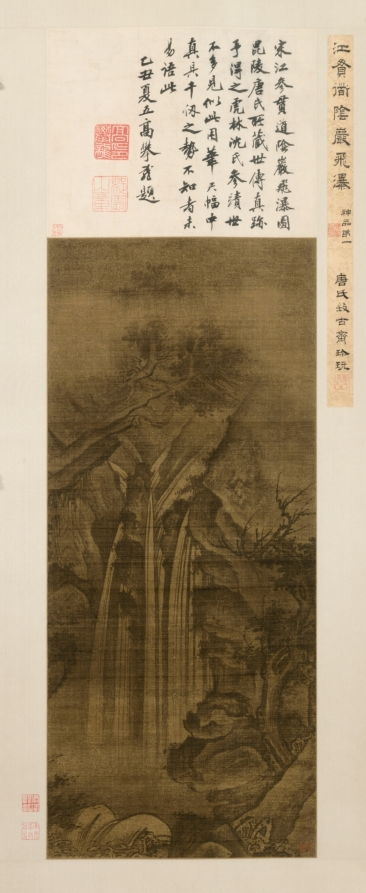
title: Waterfall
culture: China, Song dynasty (960-1279) - Yuan dynasty (1271-1368)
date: 1271–1368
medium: hanging scroll, ink and slight color on silk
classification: Painting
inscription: Label on the mounting with 2 seals of T'ang ? of Pi-ling (16th c.); label on back of mounting of Kü Kuang-hsü (1731-1797). 1 colophon and 8 additional seals: 1 colophon, dated 1625, and 2 seals of Kao P'an-lung (1562-1626); 2 seals of Liu Shu (1759-1816); 1 seal of Pi Lung (late 18th c.); 1 seal of Ts'ao tzu-wen; 2 seals unidentified. WKH